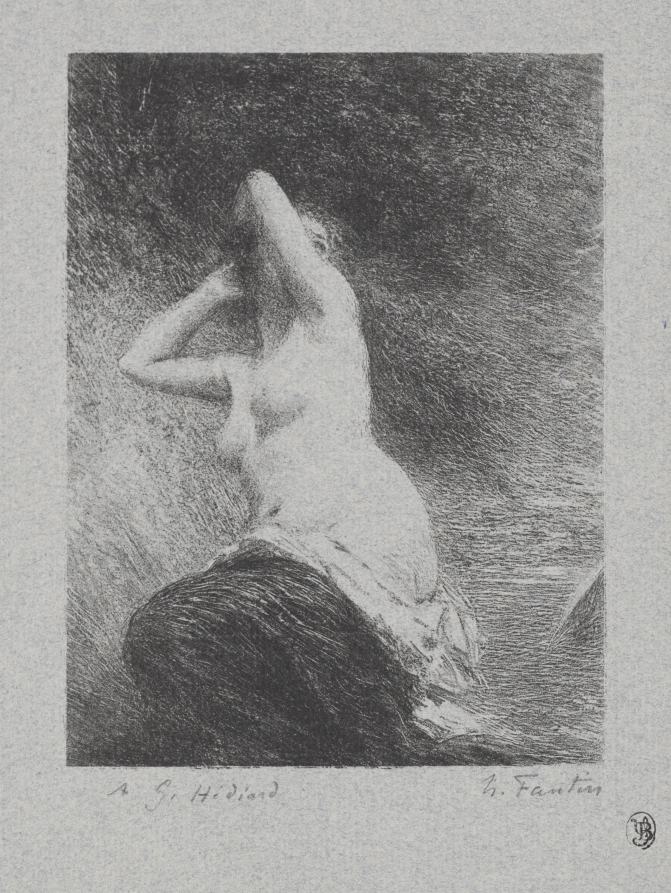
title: Ariadne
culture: France, early 20th Century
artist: Henri Fantin-Latour (French, 1836–1904)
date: 1900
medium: lithograph on blue paper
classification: Print